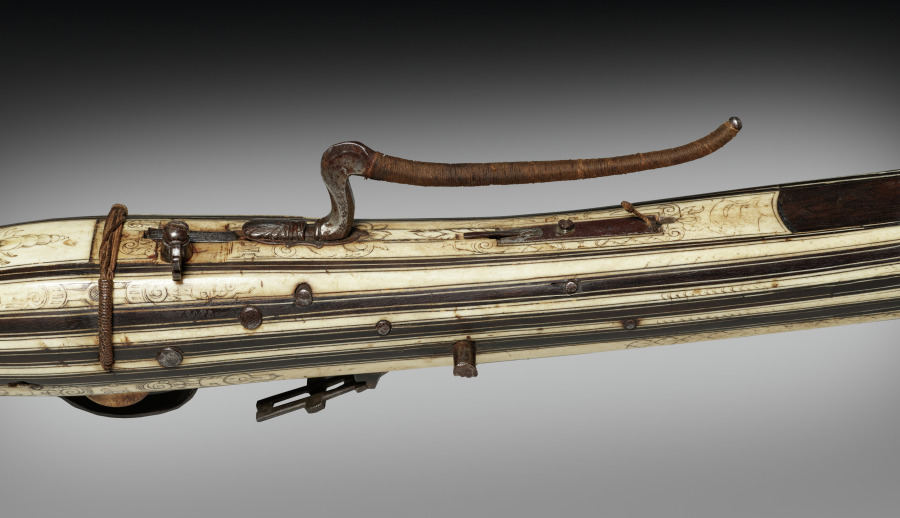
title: Crossbow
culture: Germany, early 17th Century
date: early 1600s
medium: wood, stag horn, flax cord and steel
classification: Arms and Armor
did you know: The decoration of four strips of inlaid horn was quite rare.